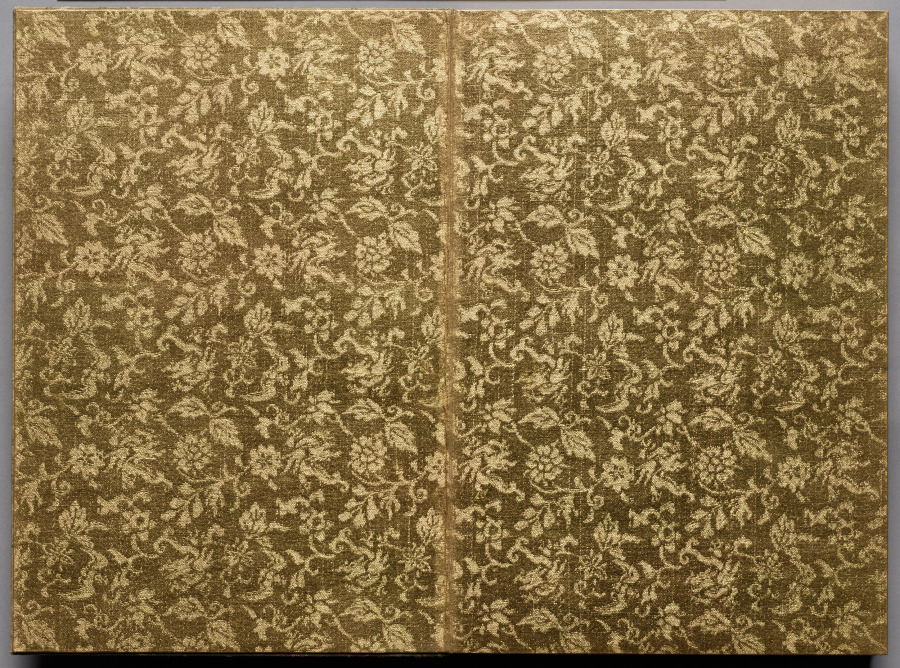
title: Flowers and Grasses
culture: Japan, Edo period (1615–1868)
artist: Tsubaki Chinzan (Japanese, 1801–1854)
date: 1841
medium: folding-album with six leaves of paintings; preface in ink on paper; paintings in ink and color on silk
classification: Bound Volume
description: This album contains six small paintings, each of which takes a different plant as its subject. The paintings include depictions of pomegranates, as well as flowering narcissus and orchid.